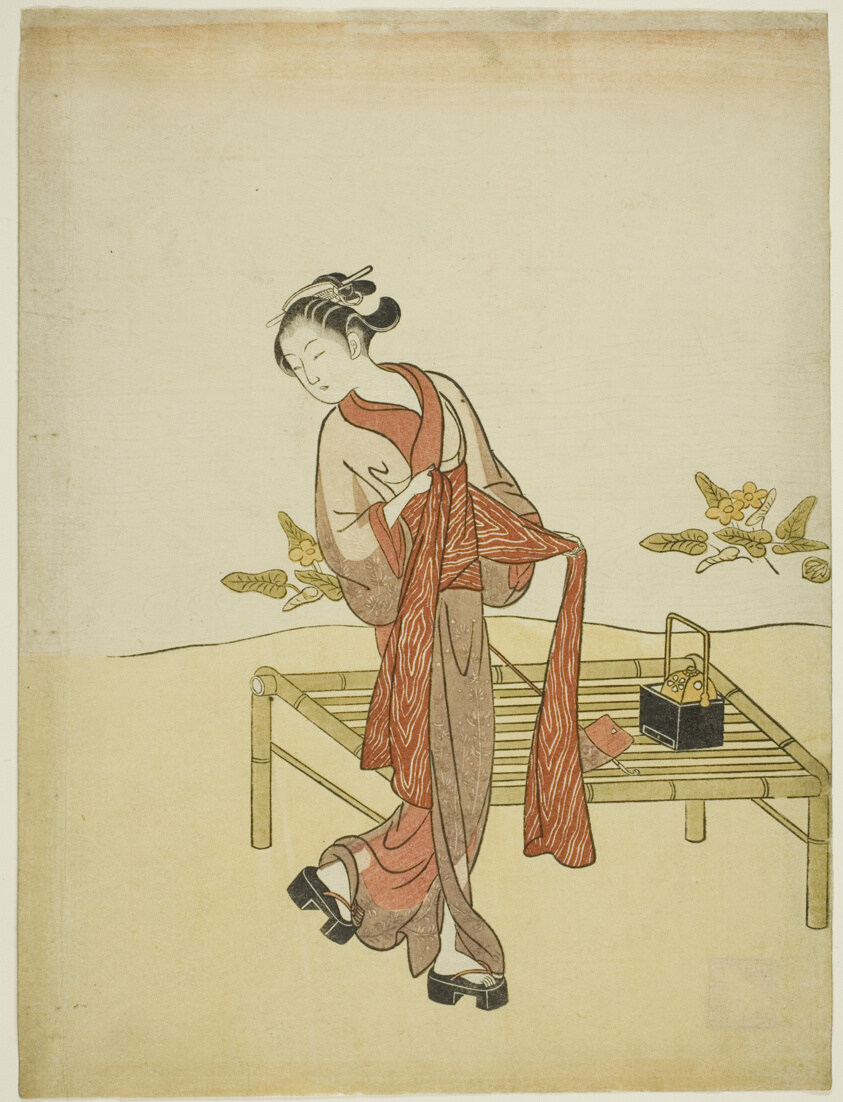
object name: Print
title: By the Stream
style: Japanese (culture or style)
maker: Attributed to Suzuki Harunobu 鈴木 春信; Japanese, 1725 (?)–1770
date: c. 1765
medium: Color woodblock print; right sheet of chuban diptych (left sheet: 1925.2031)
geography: Japan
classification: woodblock print; print; asian art